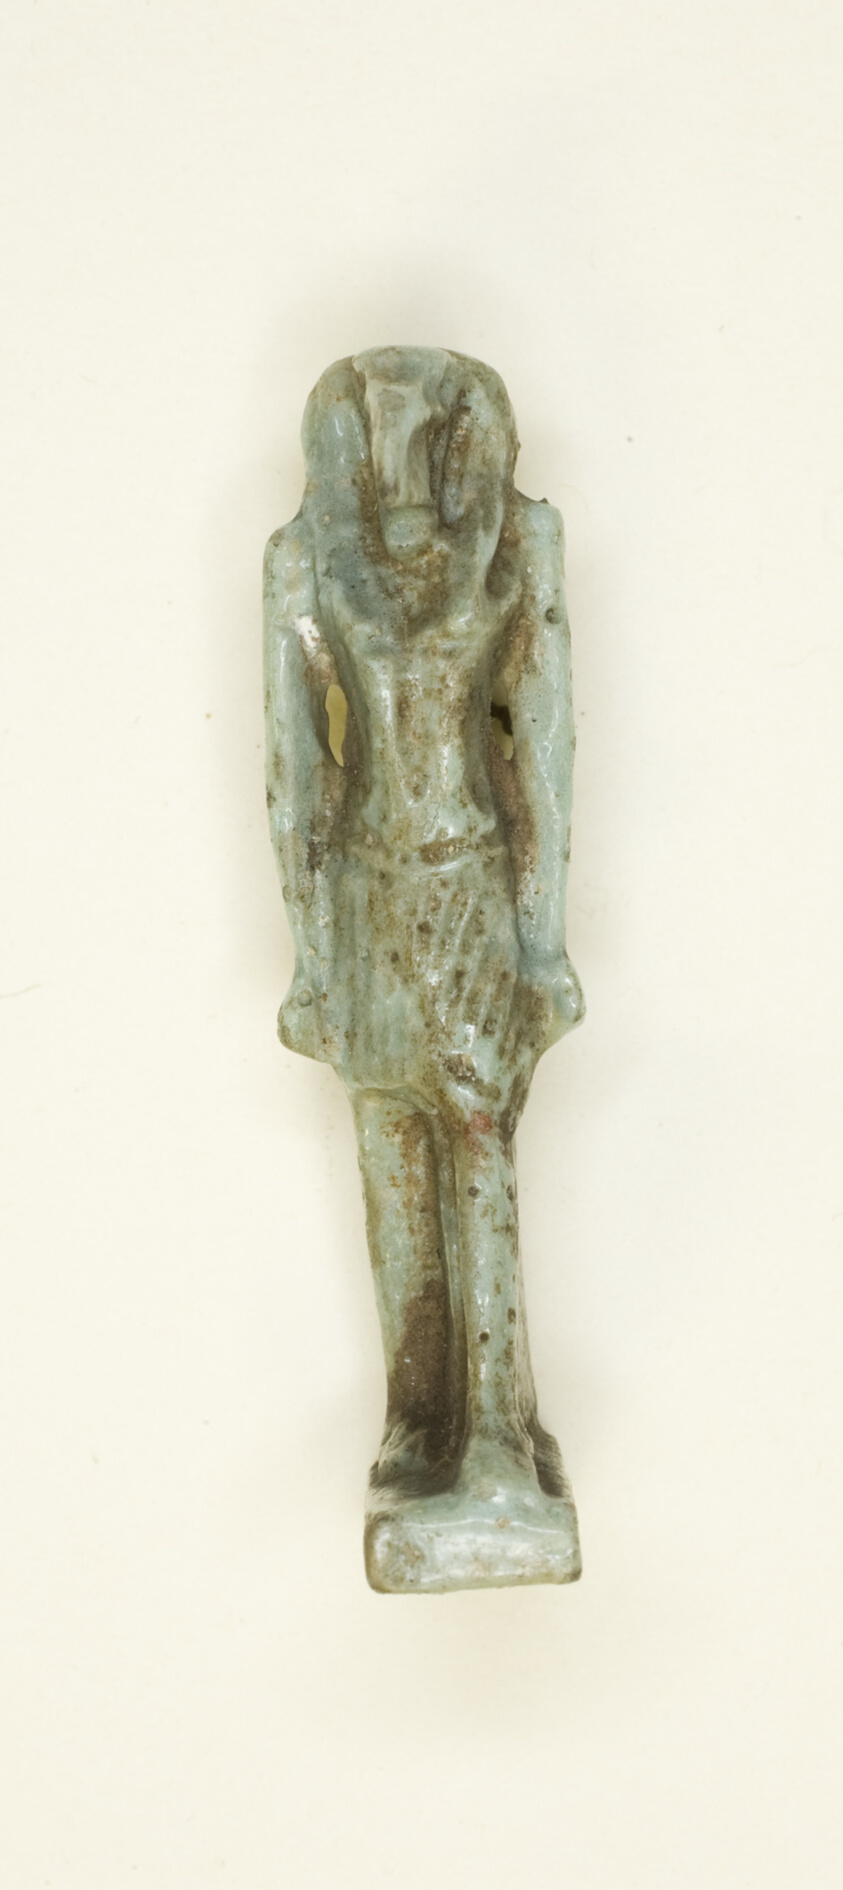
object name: Costume and Accessories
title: Amulet of the God Thoth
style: egyptian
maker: Egyptian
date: Late Period, Dynasties 26–31 (664–332 BCE)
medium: Faience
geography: Egypt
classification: amulet; jewelry; ceramics; ancient art; costume; faïence (composite material)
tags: gods (deities)